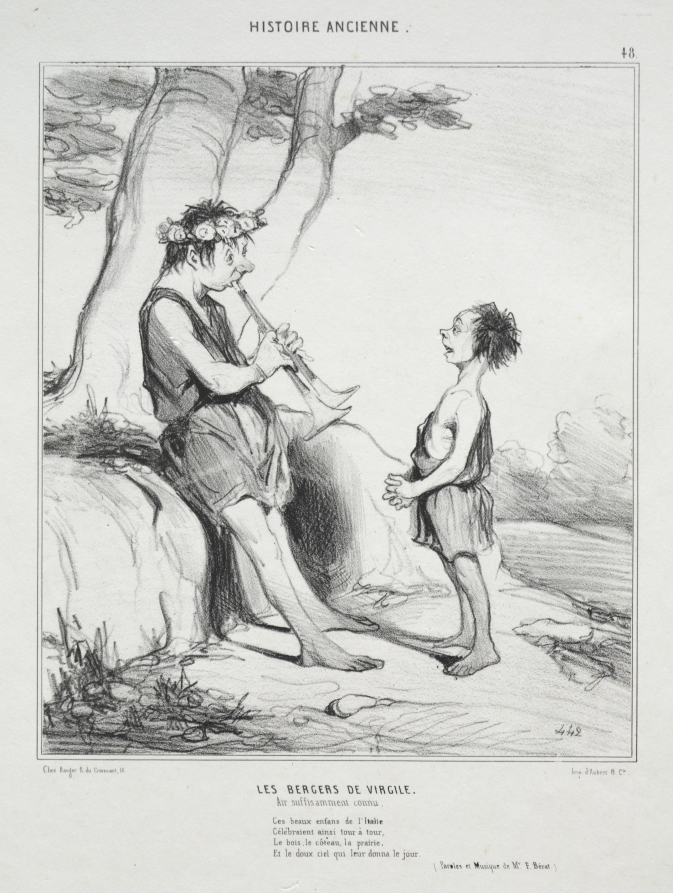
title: The Shepherds of Virgil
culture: France, 19th century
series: Ancient History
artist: Honoré Daumier (French, 1808–1879)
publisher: Aubert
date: 1842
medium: lithograph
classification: Print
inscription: Upper margin, in pencil: H.D 1948 L.D. 972 ; lower margin, printed: Chez Bauger, R. du Croissant, 16 / Imp. d'Aubert & Cie. ; in pencil: Le, S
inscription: Above image, printed: HISTOIRE ANNCIENE. / 48. ; below image, printed: "LES BERGERS DE VIRGILE. / Air suffisamment connu. / Ces beaux enfans de l'Italie / Célébraint ainsi tour à tour, / Le bois, le côteau, la prairie, / Et le doux ciel qui leur donna le jour. / (Paroles et Musique de Mr. F. Bérat.)"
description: This print was published in Le Charivari (December 31, 1842) as plate 48 from the series Ancient History.